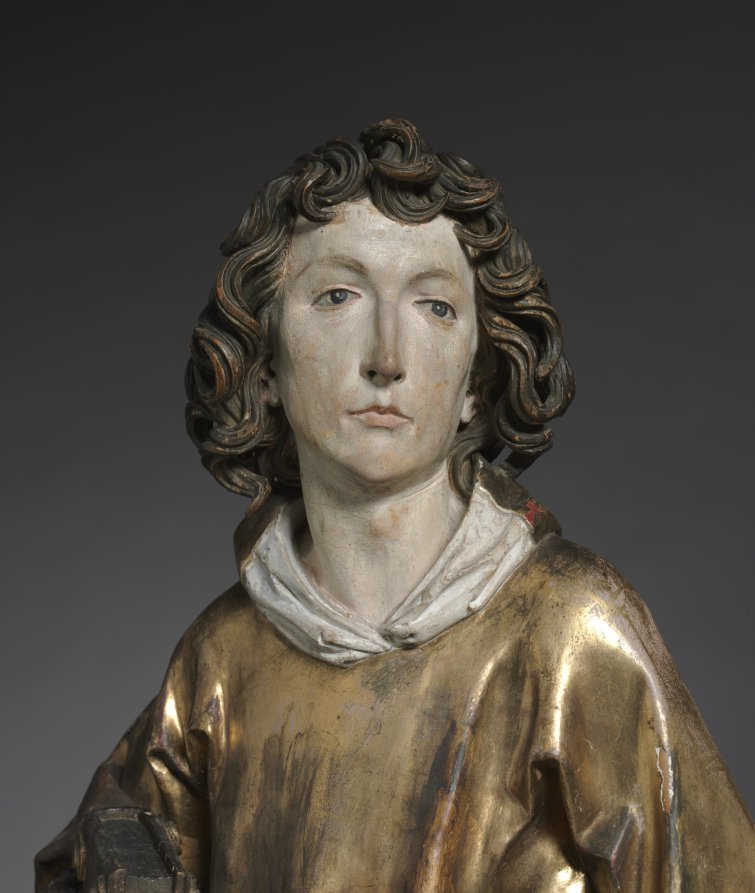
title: Saint Stephen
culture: Germany, Würzburg, 16th century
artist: Tilman Riemenschneider (German, active Würzburg, c. 1460–1531)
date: 1502–8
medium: lindenwood with polychromy and gilding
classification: Sculpture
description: This sculpture, along with that of Saint Lawrence (1959.42) and two others in Germany, are believed to be the remaining fragments of a large altarpiece carved by Riemenschneider for the Dominican convent in Rothenburg in Franconia (demolished in 1813). Saints Stephen and Lawrence both wear the dalmatic to indicate their status as deacons in the early church. Each holds a symbol of his martyrdom; here, Saint Stephen cradles some stones to indicate his death by stoning. Art in Germany through the early 1500s remained firmly anchored in the late Gothic style with its associated interests in realism. Riemenschneider was one of the most prolific and versatile sculptors of this style, a recognized master in both stone and wood. His flourishing workshop employed as many as 40 apprentices in sculpting, woodcarving, and painting. His sculptures are noted for the dreamy, melancholy, and introspective quality in their expressions, as well as their remarkable attention to detail.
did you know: Tilman Riemenschneider (c. 1460–1531) is probably the most famous German sculptor of the period around 1500.